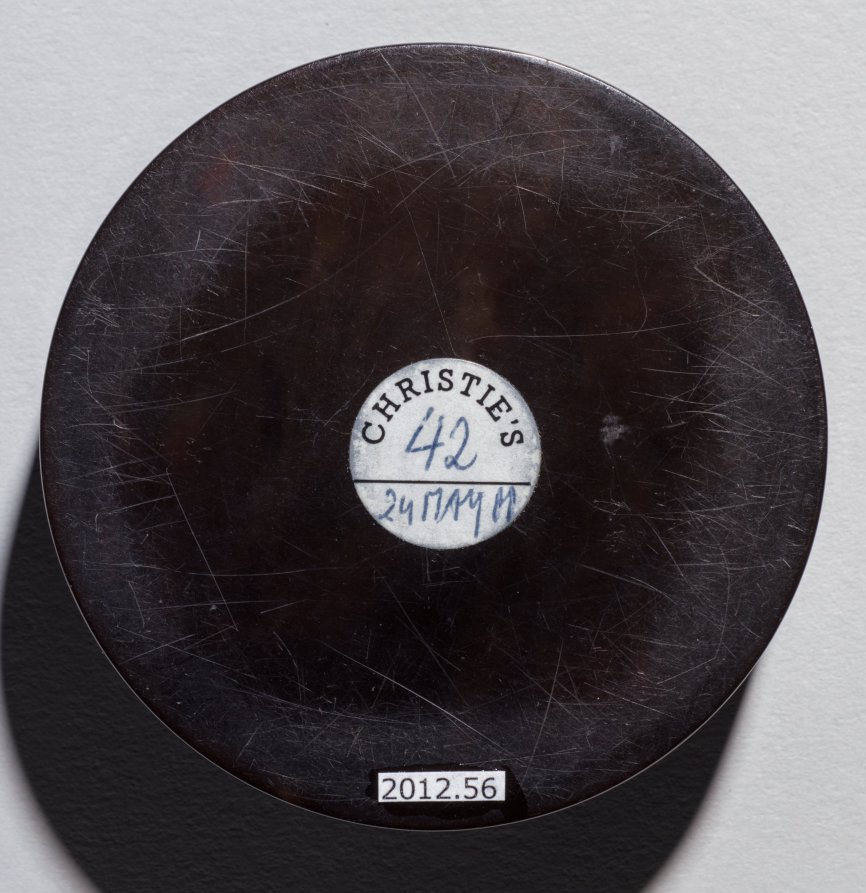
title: Portrait of the Artist's Children Emma and Paul (box)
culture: France, 18th century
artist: Jean-Antoine Laurent (French, 1763–1832)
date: c. 1795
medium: watercolor on ivory, gold mount, set in the cover of a composition bonbonniere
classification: Portrait Miniature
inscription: signed at mid-center "Laurent"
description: This sensitive depiction of his children exhibits Laurent's ability to portray the psychological interiority of his subjects, young or old. The miniature shows Laurent's son and daughter in white chemise gowns with green ribbon accents. They both have striking blue eyes and slightly curled blond hair. The younger sibling tenderly holds the arm of the older one, who sits on a chair strewn with pink rose petals and inscribed with the artist's signature. The children are placed within an environment in which green foliage sprouts small blue and purple flowers. This organic setting reflects 18th-century Western philosophies of natural child rearing, characterized by treating childhood as a period of innocence distinct from adulthood and advocating that children not be treated as miniature adults but instead should have their naiveté celebrated. This philosophy influenced children's clothing. Instead of dressing children as small adults in constrictive costumes, both genders wore loose chemises, like the ones seen here, that encouraged mobility.